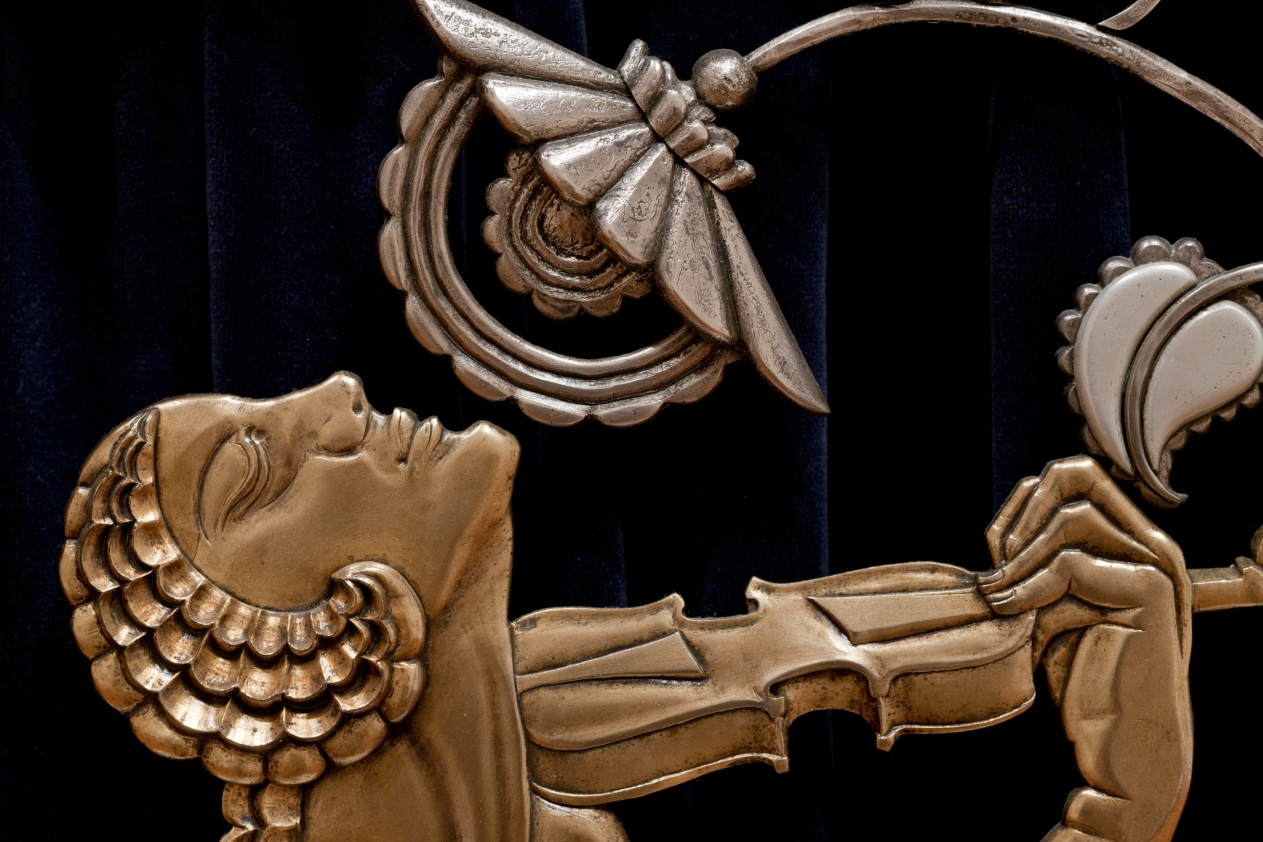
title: Muse with Violin Screen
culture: America, Ohio, Cleveland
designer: Paul Fehér (American, born Hungary, 1898–1990)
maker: Rose Iron Works (America, Ohio, Cleveland, est. 1904)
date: 1930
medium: Steel, brass; silver and gold plating, cotton velveteen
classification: Metalwork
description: Since the early years of the 20th century, the Rose Iron Works, a Cleveland supplier of architectural ornament, has produced distinguished metalwork. The company’s founder, Martin Rose, was born in Austria-Hungary and studied ornamental metalsmithing in Vienna prior to immigrating to Cleveland in 1902. In the 1920s, he hired a talented young Parisian designer, Paul Fehér, to work for the firm. Fehér’s designs, culminating in this massive screen, brought a modern European sensibility to the Rose Iron Works production. With its geometric patterning, highly stylized and abstracted natural forms, and the central figure reminiscent of the celebrated jazz singer Josephine Baker, this screen reflects the classic motifs of Art Deco design.